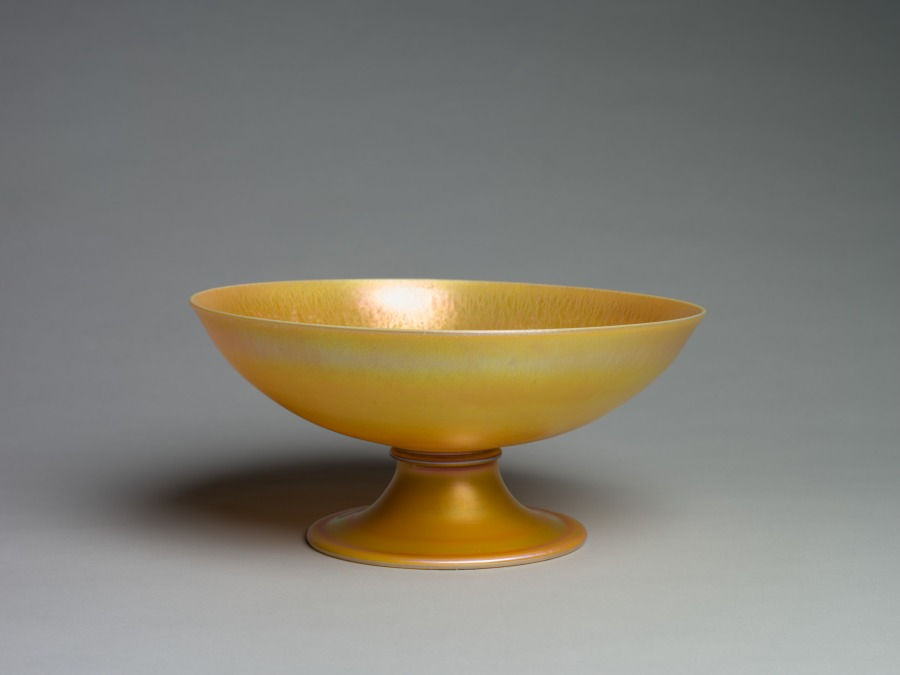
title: Compote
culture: America, New York, Brooklyn, 20th century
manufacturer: Quezal Art Glass and Decorating Company (American, 1901–1924)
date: c. 1910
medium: glass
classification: Glass